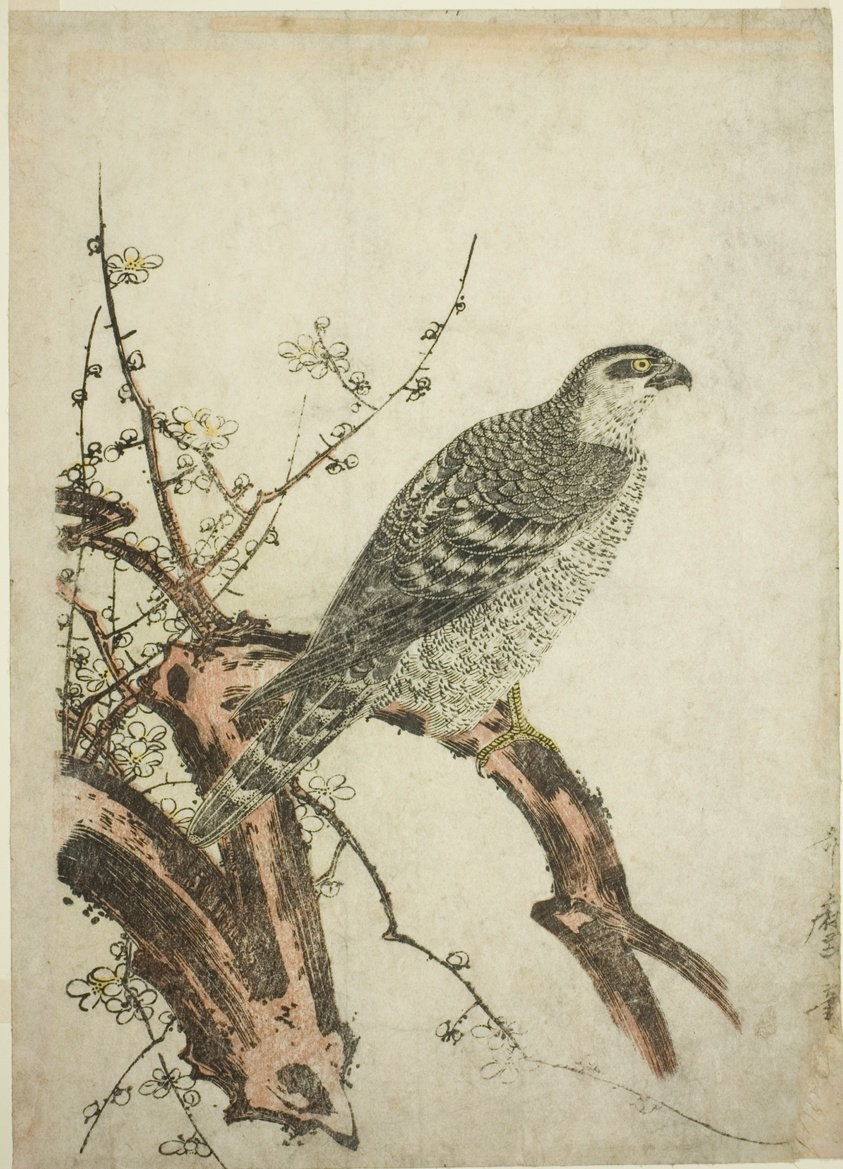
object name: Print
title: Hawk on a Plum Branch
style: Japanese (culture or style)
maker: Kitagawa Utamaro 喜多川 歌麿; Japanese, 1753 (?)-1806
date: c. 1796/1804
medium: Color woodblock print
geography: Japan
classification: woodblock print; print; asian art